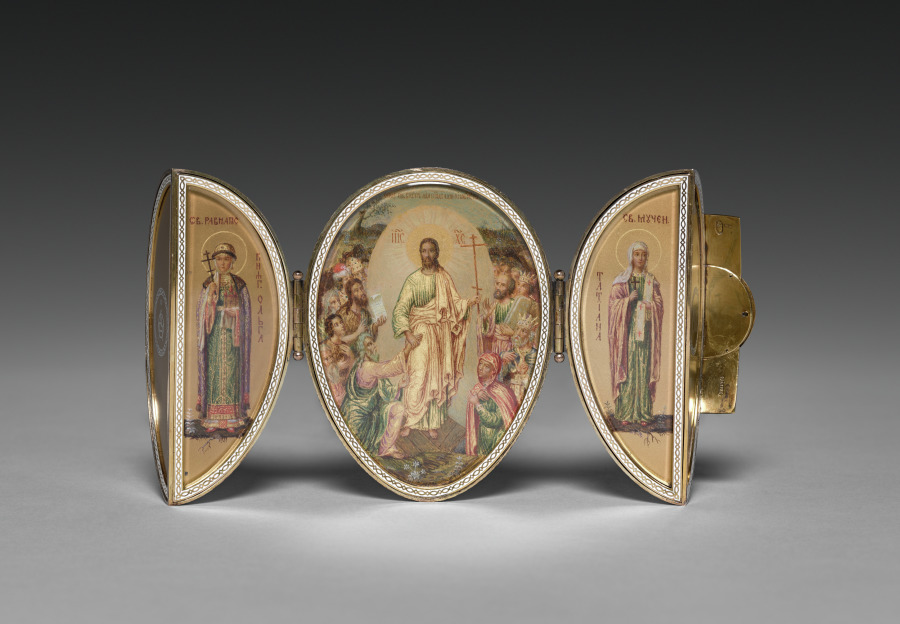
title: Imperial Red Cross Easter Egg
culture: Russia, St. Petersburg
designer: Peter Carl Fabergé (Russian, 1846–1920)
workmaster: Henrik Wigström (Russian, 1862–1923)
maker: House of Fabergé (Russian, 1842–1918)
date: 1915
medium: gold, silver gilt, enamel, glass, ivory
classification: Miscellaneous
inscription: inscribed on interior of egg: symbols for Alpha and Omega and imperial crown for Alexandra Feodorovna; 1915; inscriptions in Cyrillic, Old Church Slavonic, and Roman letters which identify Sts. Olga and Tatiana and presumably describe the central scene of the triptych.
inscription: Inscribed on silk velvet and satin lined case: double-headed eagle, Fabergé, Petersburg, Moscow, London (all in Cyrillic on lining of case); 17.559, abbreviation for "Red Cross" (in Cyrillic in red ink on outside of case).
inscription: Hallmarks: 72, Kokoshnik, lower case alpha in script [assay mark of St. Petersburg, 1908-26]; H.W. [initials of workmaster Henrik Wigström]; Fabergé (in Cyrillic).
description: The House of Fabergé made two imperial Easter eggs in 1915 that honored the contributions of Tsarina Alexandra and her two eldest daughters, Olga and Tatiana, to the war effort as Red Cross Sisters of Mercy. Compared to other Fabergé eggs elaborately ornamented with jewels, the eggs reflected the mood of austerity in Russia during World War I. This version becomes an icon when opened, revealing miniatures of the patron saints of the tsarina’s daughters. After the Russian Revolution, this relic of the Tsarist past was sold by the Soviet government to raise needed cash for the treasury.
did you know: This egg was confiscated by the Bolsheviks during the Russian Revolution and sold by the government of Josef Stalin in the 1930s to raise money for the Soviet treasury.